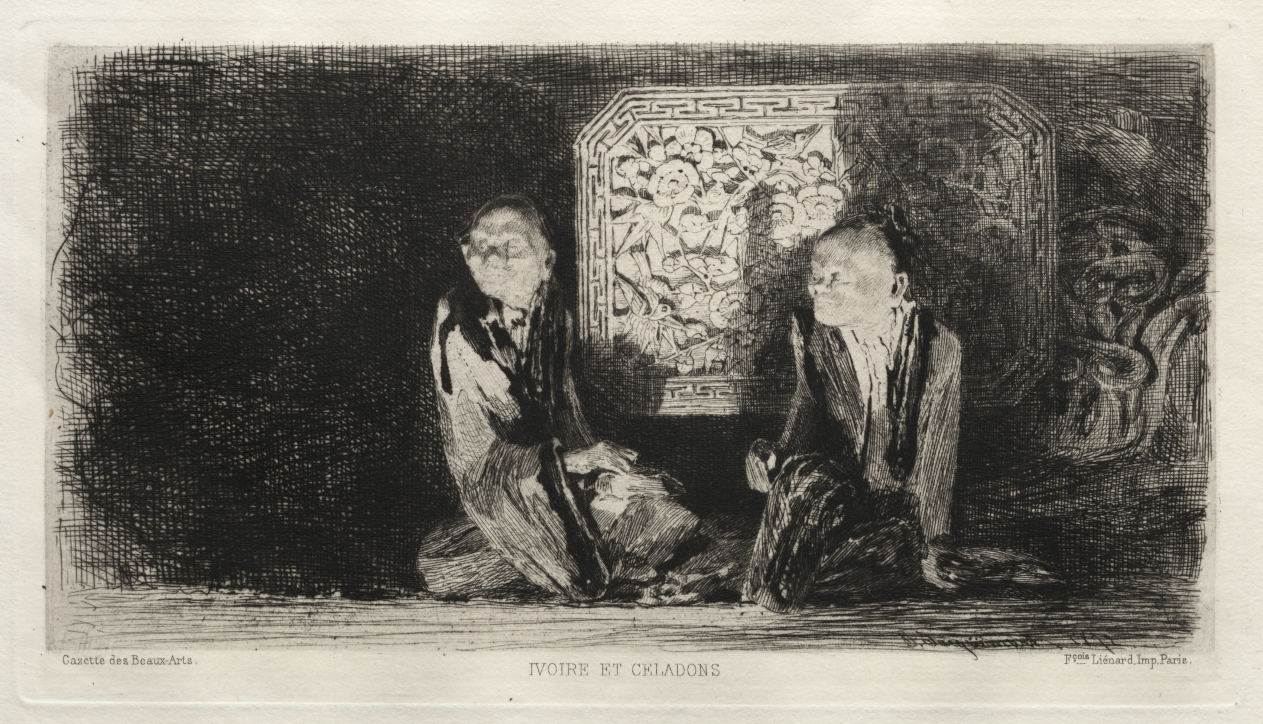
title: Ivory and Celadon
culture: France, 19th century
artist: Jules Jacquemart (French, 1837–1880)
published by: Gazette des Beaux-Arts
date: 1872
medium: etching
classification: Print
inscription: lower right, in plate: J. Jacquemart